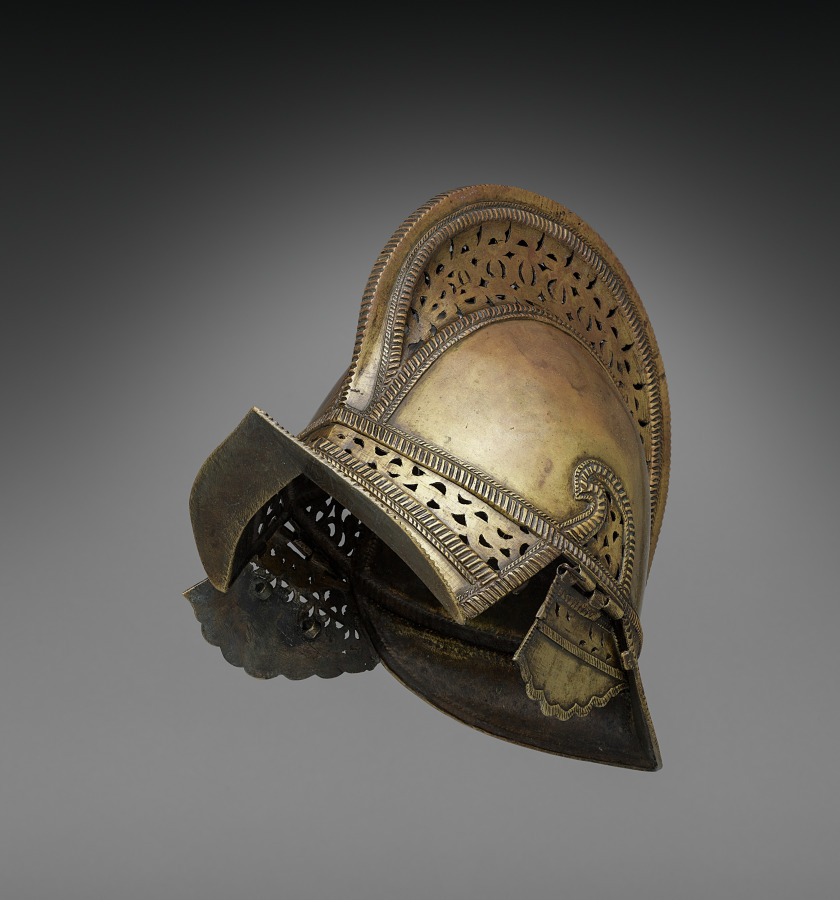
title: Helmet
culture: Philippines, Mindanao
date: 1800s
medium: Brass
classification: Arms and Armor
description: The predominantly Muslim Maranao people of the southern Philippines developed a rich material culture—including brass work, textiles, weaponry, and architecture—commonly featuring a curvilinear, geometric ornament known as okir. This helmet, while based on Spanish types, features filigree vents and openwork embellishment that are distinctively Mindanao. The top might once have been decorated with feathers or other ornaments.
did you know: Bacolod, the traditional homeland of the Maranao people, is a historic pangampong (fortified settlement) on Lake Lanao.